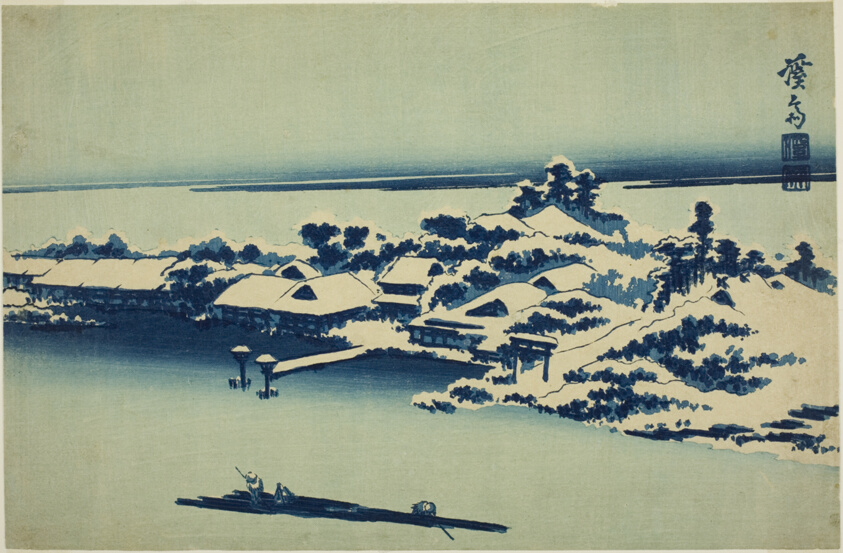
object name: Print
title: Snow on the Sumida River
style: Japanese (culture or style)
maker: Keisai Eisen (Japanese, 1790-1848)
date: early 1830s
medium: Color woodblock print; oban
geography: Japan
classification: woodblock print; print; asian art